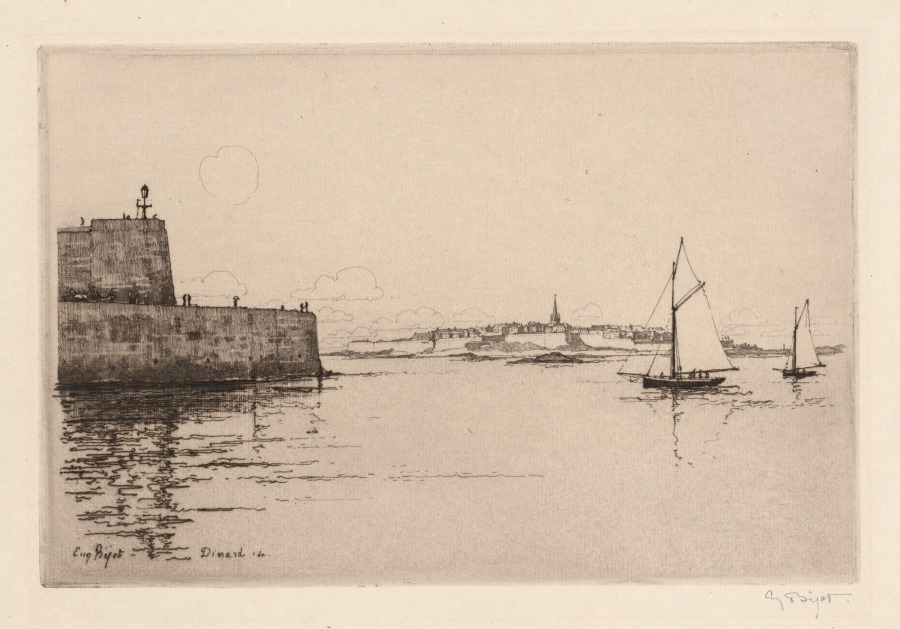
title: Saint-Malo Viewed from Dinard (Saint-Malo vu de Dinard)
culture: France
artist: Eugène Bejot (French, 1867–1931)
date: 1914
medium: etching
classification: Print